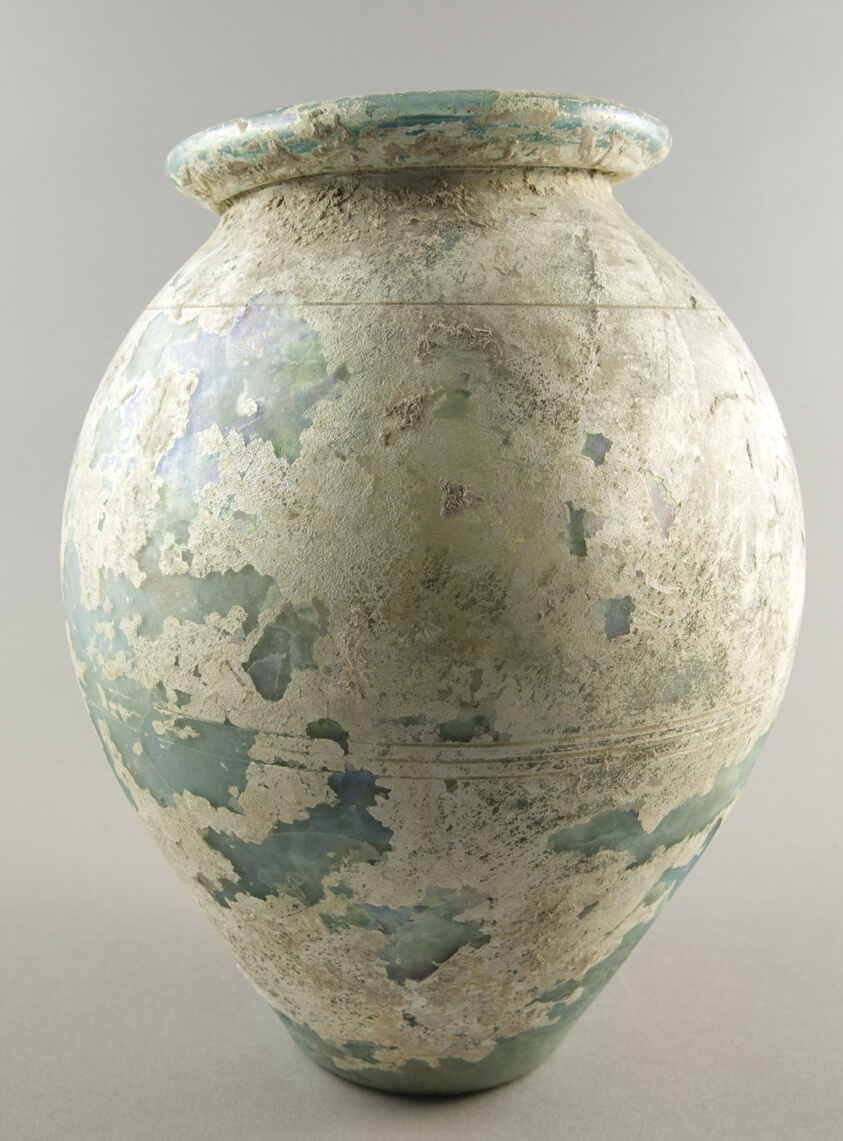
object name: Funerary Object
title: Cinerary Urn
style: ancient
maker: Ancient Mediterranean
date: 2nd-4th century CE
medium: Glass, human remains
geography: Mediterranean Region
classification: glass; vessel; ancient art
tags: urns, funerary art